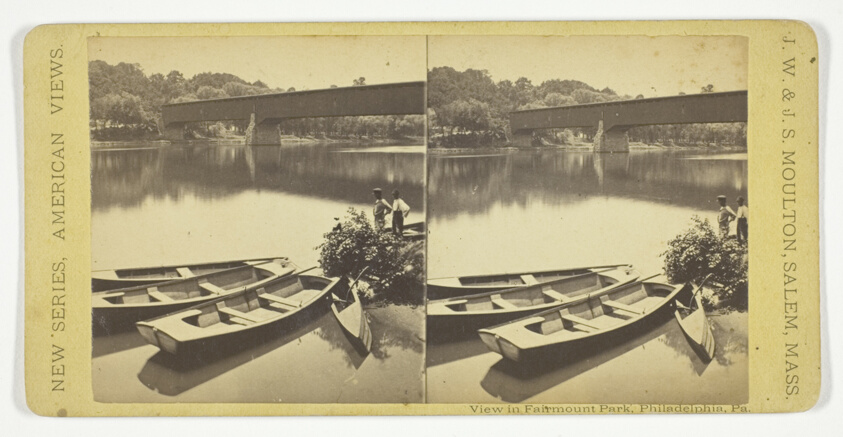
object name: Photograph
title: View in Fairmount Park, Philadelphia, Pa.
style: 19th century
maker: J.W. & J.S. Moulton (Americans, active 1873-1881)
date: 1873/81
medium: Albumen print, stereo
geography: Salem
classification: photography; photograph